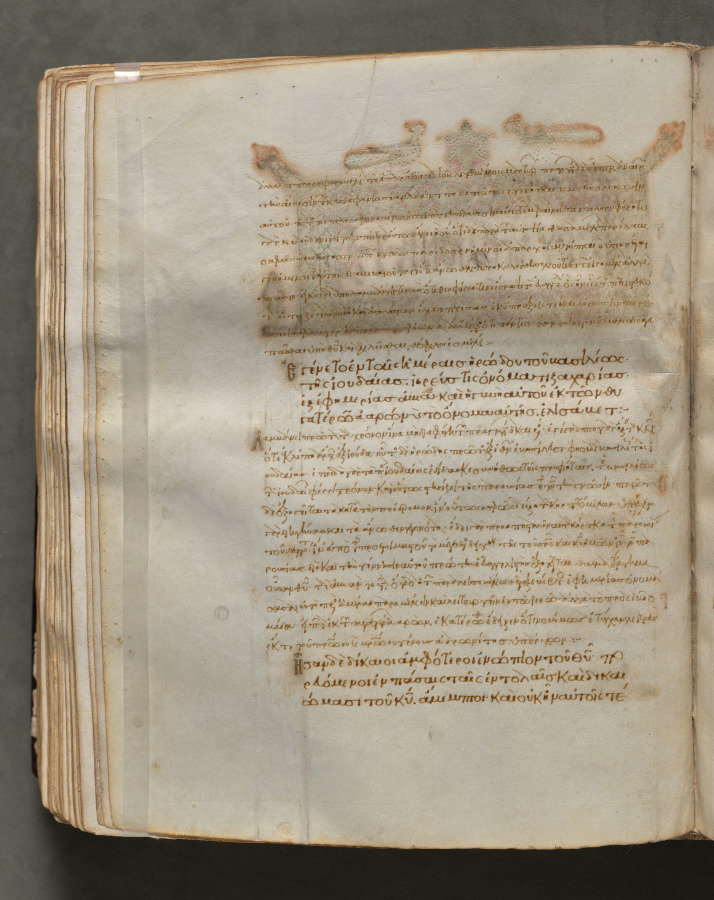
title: Text, folio 200 (verso), from a Gospel Book with Commentaries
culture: Byzantium, Constantinople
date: c. 1000–1100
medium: ink, tempera, and gold on vellum; leather binding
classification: Bound Volume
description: Each of the four gospels in this book opens on a page with brilliantly illuminated borders depicting the author of the text as well as birds-principally peacocks, symbols of the immortality of the soul-and fountains, representing the fountain of life and the salvation of the soul. This volume consists of 428 leaves with texts in Greek. Its level of sophistication suggests that it was probably written and decorated in a monastery in Constantinople.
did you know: Gospel Books were carried in procession through Byzantine churches.